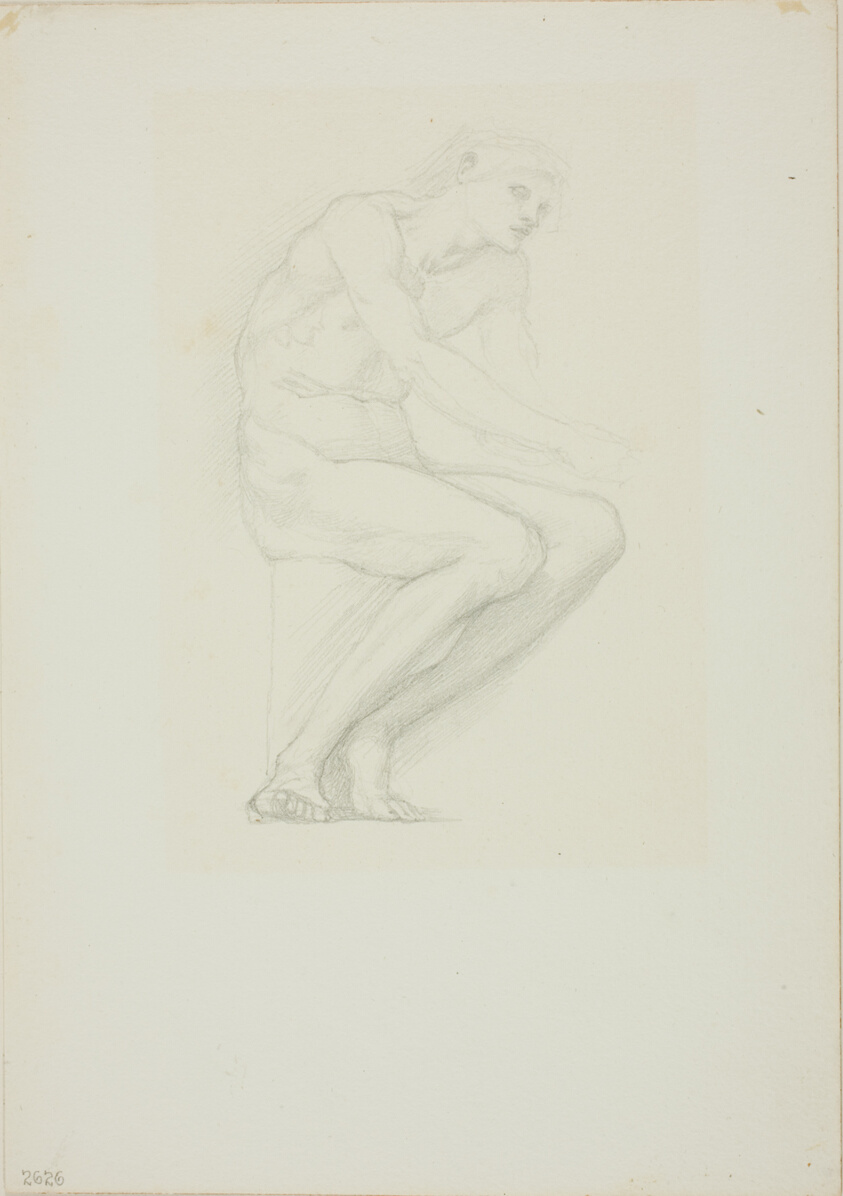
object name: Drawing and Watercolor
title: Seated Male Nude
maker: Sir Edward Burne-Jones (English, 1833-1898)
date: c. 1873–77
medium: Graphite on ivory wove paper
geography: England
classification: graphite; drawings (visual works); prints and drawing